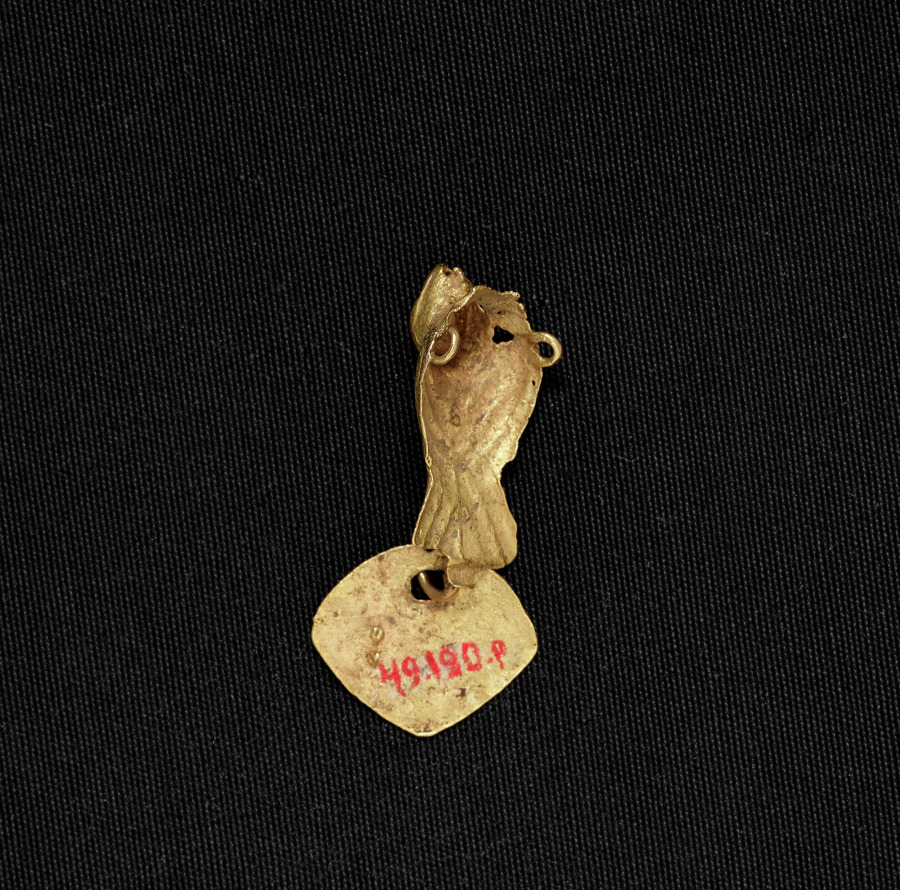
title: Bird Bead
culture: Colombia, Muisca style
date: c. 900–1550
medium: cast gold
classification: Jewelry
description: Muisca metalwork divides into two categories: ornaments to be worn, such as these, and offering figurines, in the case to the right. The elaborate bird pendant features delicate herringbone moldings, openwork patterns, and wing details-all part of the wax model from which the pendant was cast (see nearby computer animation). The dangles were attached after casting.